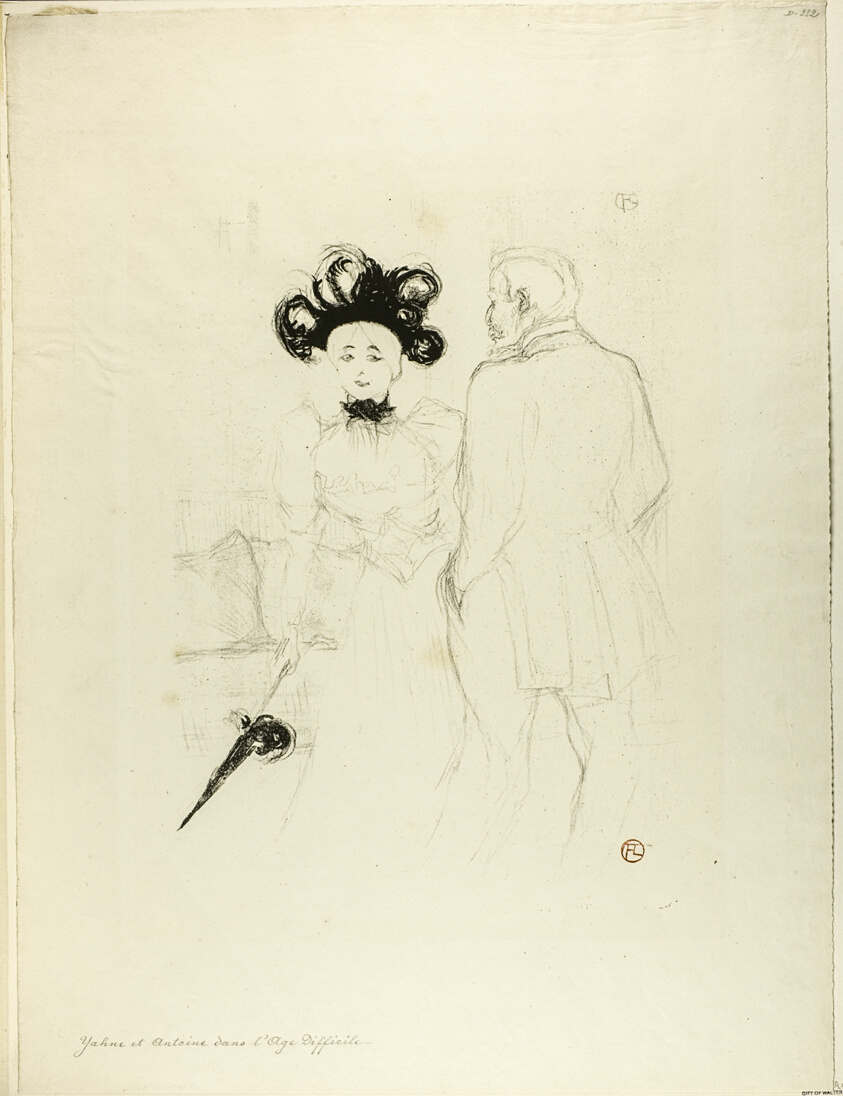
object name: Print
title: Yahne and Antoine, in L'Age Difficile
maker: Henri de Toulouse-Lautrec (French, 1864-1901)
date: 1895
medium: Color lithograph on ivory wove paper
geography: France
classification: lithograph; print; prints and drawing